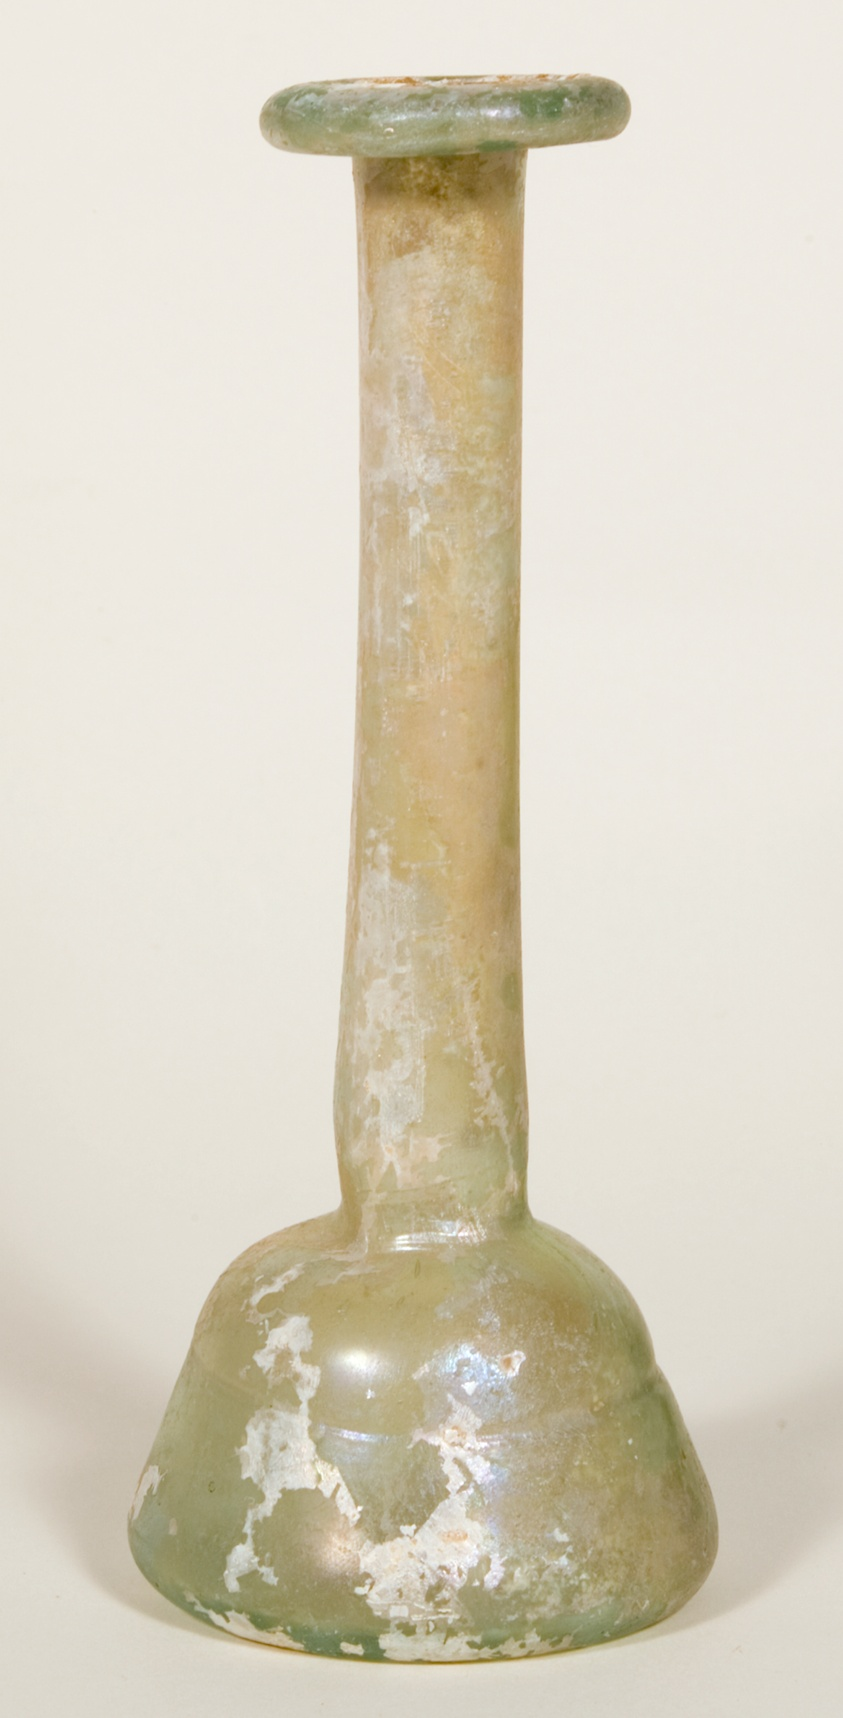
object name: Vessel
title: Bottle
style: syrian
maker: Roman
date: 2nd-3rd century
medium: Glass, blown technique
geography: Syria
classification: bottle; glass; vessel; ancient art